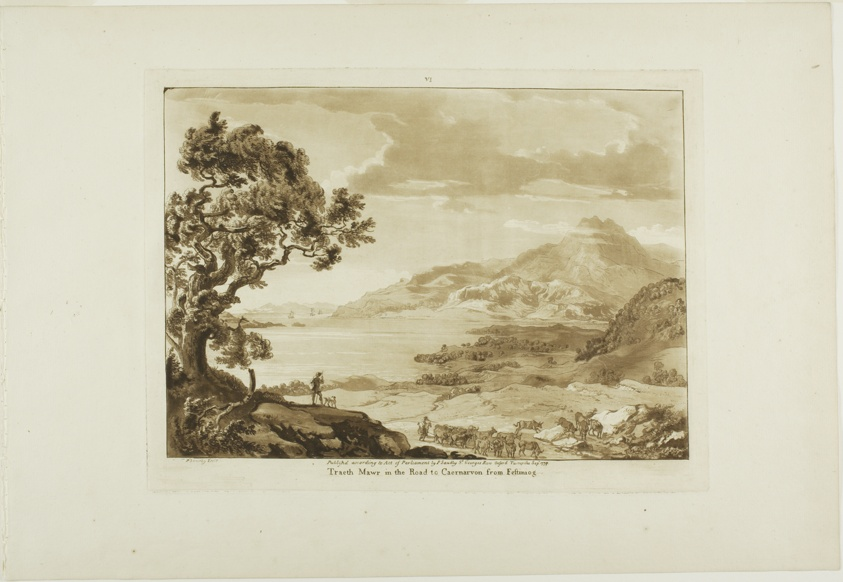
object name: Print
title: Traeth Mawr in the Road to Caernarvan from Fistiniog, plate six from Twelve Views in Wales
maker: Paul Sandby (English, 1731-1809)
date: 1777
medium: Aquatint on cream laid paper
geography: England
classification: aquatint; print; prints and drawing